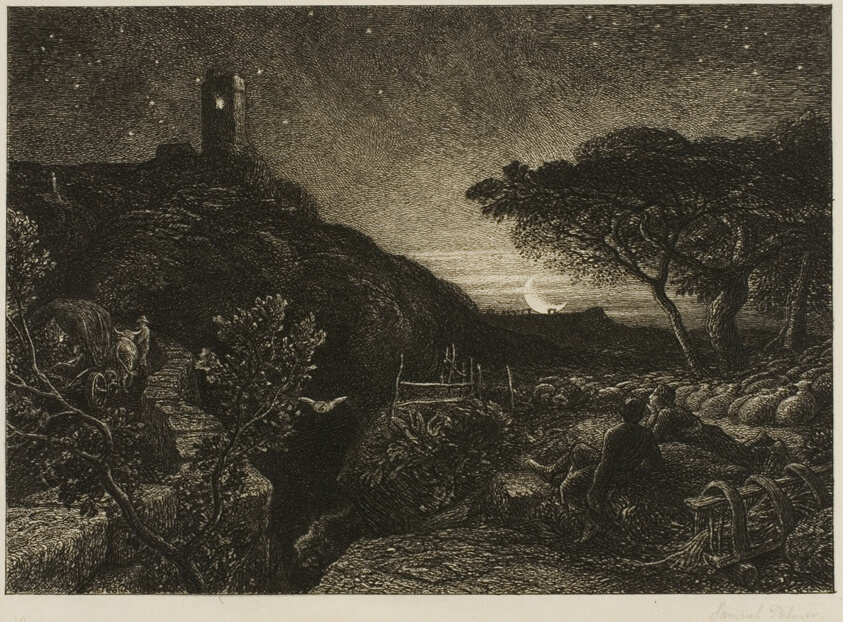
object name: Print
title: The Lonely Tower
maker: Samuel Palmer (English, 1805-1881)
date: 1880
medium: Etching on paper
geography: England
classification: etching; print; prints and drawing